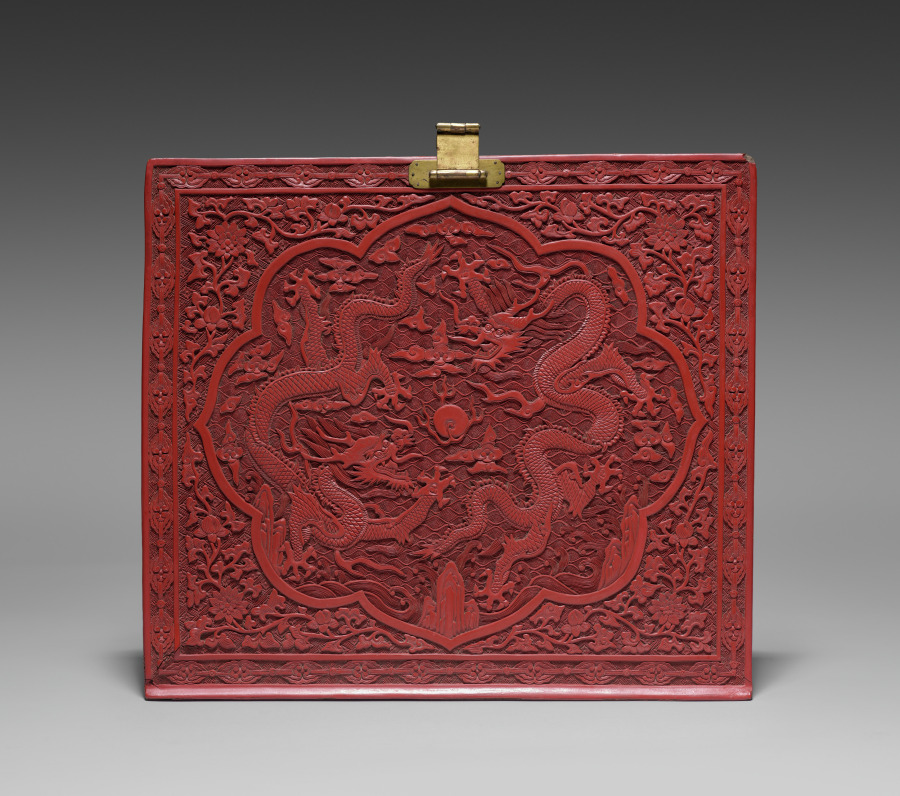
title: Cover Panel for a Tihong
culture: China, Ming dynasty (1368-1644), Wanli reign (1572-1620)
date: 1585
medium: carved cinnabar lacquer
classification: Lacquer